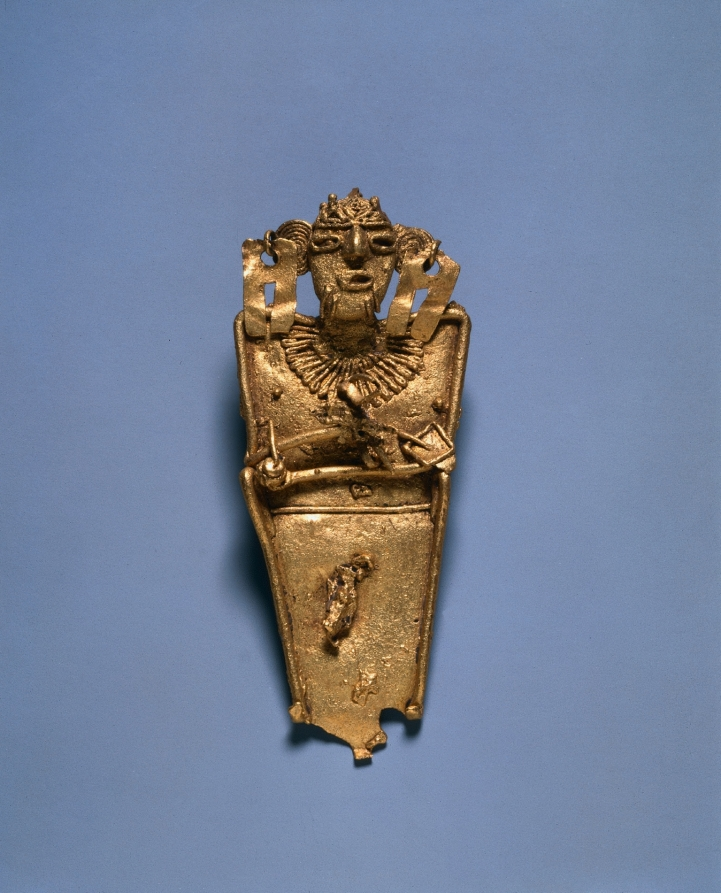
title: Tunjos (Votive Offering Figurine)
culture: Colombia, Muisca style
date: c. 900–1550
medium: cast gold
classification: Metalwork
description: Unlike the other gold ornaments made in the isthmian region, tunjos were not worn; instead, they served as offerings that were deposited in sacred places such as lagoons and caves. They often depict humans who hold something. Perhaps because they were not meant for display, tunjos were not finished after lost-wax casting. Flaws remain uncorrected, surfaces are unpolished, and gold that backed into the channel used to pour the molten metal into the mold was left in place.